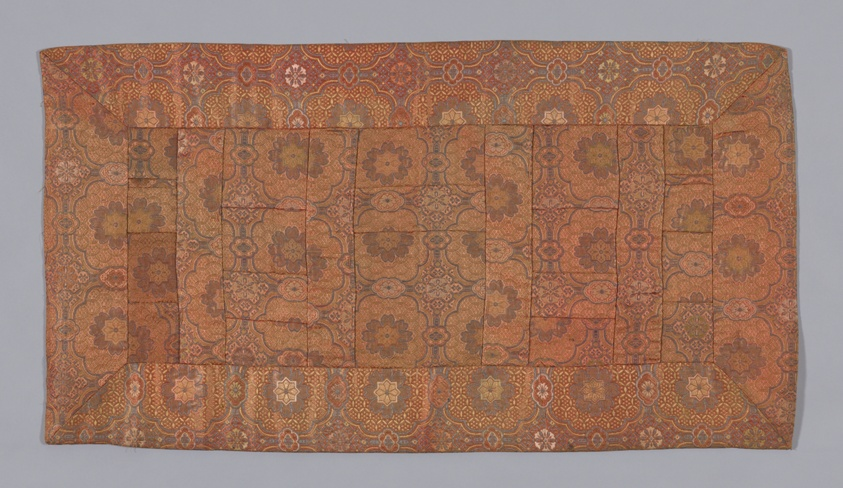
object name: Textile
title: Zagu (Seating Mat)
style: edo (japanese period)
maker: Japan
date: Edo period (1615–1868), 1775/1800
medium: compound satin weave; silk and gilt-paper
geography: Japan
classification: textile; liturgical - buddhist; costume; weaving